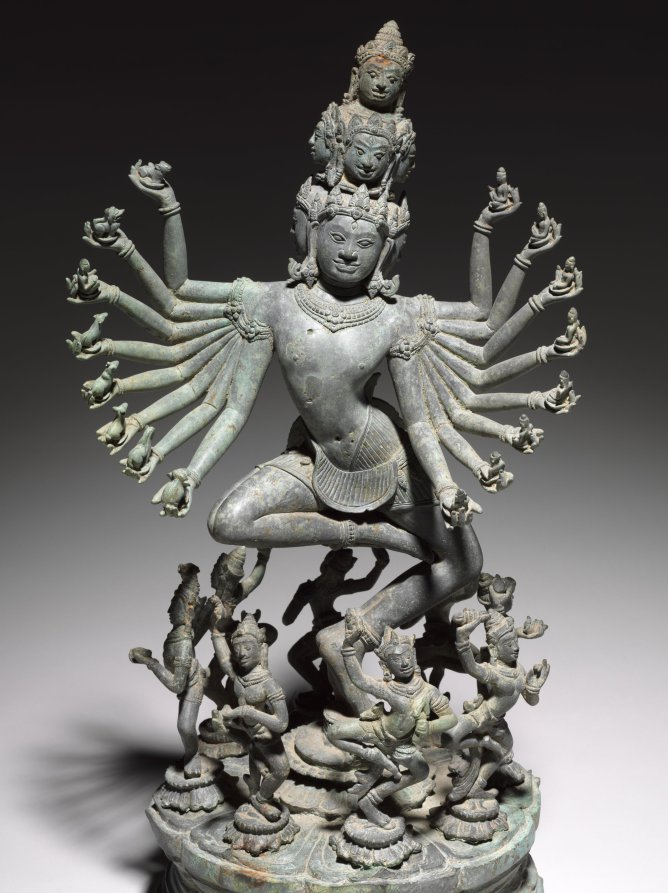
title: Hevajra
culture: Northeastern Thailand, former kingdom of Angkor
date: c. 1200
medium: Bronze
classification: Sculpture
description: Hevajra was an important figure signaling the practice of Buddhist rituals. King Jayavarman VII placed particular emphasis on Hevajra during consecration rituals and set up a colossal stone sculpture of dancing Hevajra at the east gate of his fortified city in the Khmer capital at Angkor. In the Cambodia of Jayavarman VII, tantric Buddhism became public and widespread, practiced together with other more mainstream forms of Buddhism, Hinduism, and ancestor worship. The iconography of Hevajra is described in detail in a text that bears his name, the Hevajra-tantra, first composed in India probably in the 800s. Hevajra has eight heads, sixteen arms, and four legs. His left hands hold images of Indic gods; wealth, death, sun, moon, fire, wind, water, and earth. In his right hands are animals: bull, lion, human, cat, camel, sheep, horse, and elephant. They all sit in skull cups, objects also used in tantric rituals. He dances on a corpse that embodies ignorance and is surrounded by eight yoginis who dance triumphantly in a ring around him. Yoginis functioned as intercessors between human practitioners and enlightened beings. Many bronze images of Hevajra were made during the reign of Jayavarman VII, but few survive in as pristine condition as this example. According to scientific analysis and curatorial reports, this sculpture survived in a clay vessel submerged in water, which accounts for its high tin content and unusual gray patina. Samples from the clay core reveal the presence of the mineral feldspar, a characteristic of clay from the Isaan plateau, on the other side of the mountain range not far from Banteay Chhmar, in present-day Thailand.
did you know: Hevajra, the Tantric Buddhist deity who personifies Enlightenment, dances vigorously to symbolize the human soul's liberation from the snare of existence.